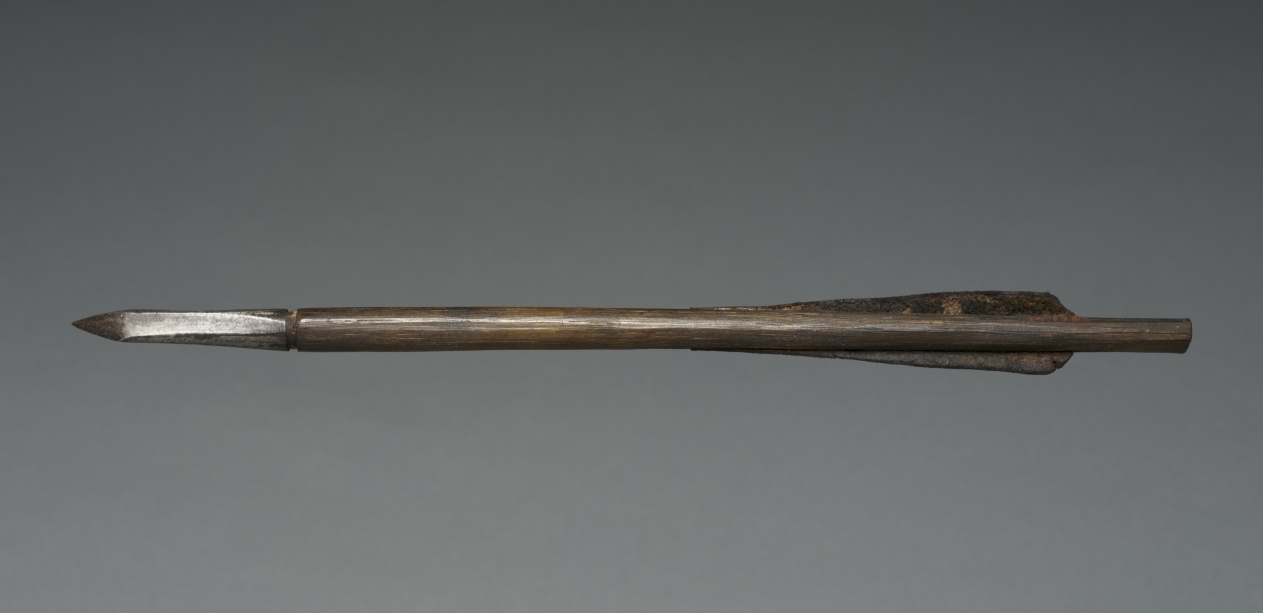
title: Crossbow Bolt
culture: Germany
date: 1500s–1600s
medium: wood, leather, steel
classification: Arms and Armor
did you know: Bolts with leather feathering were used mainly in the Tyrolean area, which includes northern Italy and western Austria.